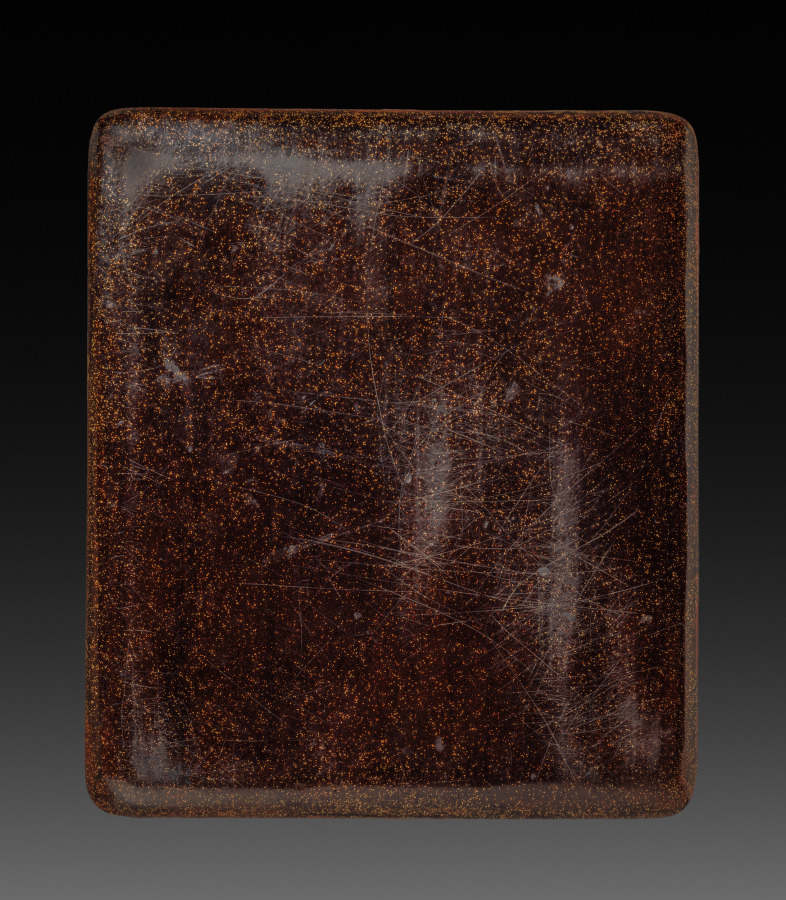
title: Writing Box (Suzuribako) with Phoenix in Paulownia (base)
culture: Japan, Momoyama period (1573–1615)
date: c. 1573–99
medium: Lacquer on wood with sprinkled gold and silver powder (maki-e) and gold and silver foil application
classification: Lacquer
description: The only place the mythical phoenix will perch is in the paulownia tree. Along with the dragon, the bird is a symbol of imperial power in East Asia. This box––a container for an inkstone, brushes, and ink––is both functional and lavish, its dramatic effects achieved with a pear-skin ground decoration (nashiji) and sprinkled powder decoration in high relief (takamaki-e).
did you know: In contrast to the bright, celebratory motifs on the exterior, the interior of the box invites a more reflective mood with its autumn moonlit sky over chrysanthemums.